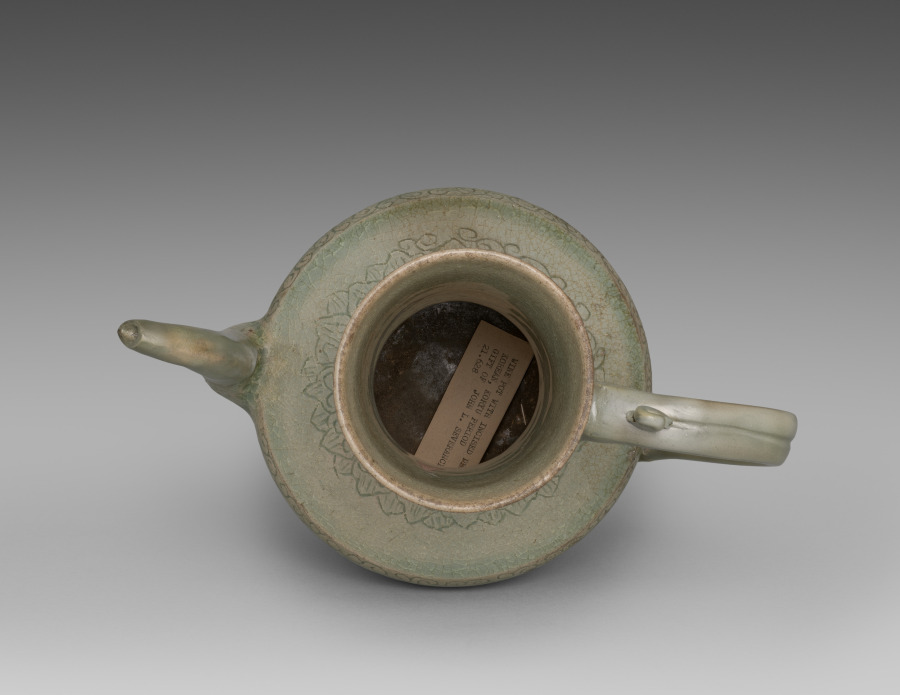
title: Wine Pot with Incised Lotus Design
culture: Korea, Goryeo dynasty (918–1392)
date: 918–1392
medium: celadon ware with incised and carved decoration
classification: Ceramic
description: As early as the seventh century, the practice of drinking tea and wine became an important part of elite culture in Korea. Elites of the Goryeo period commissioned a variety of types of utensils and vessels including this elegant wine pot with the incised image of lotus flowers, not only to make their drinking experience more exciting, but also to show their appreciation of nature.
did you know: A small loop on the handle was intended to secure the lid (now missing) on top of the pitcher through a cord or chain.